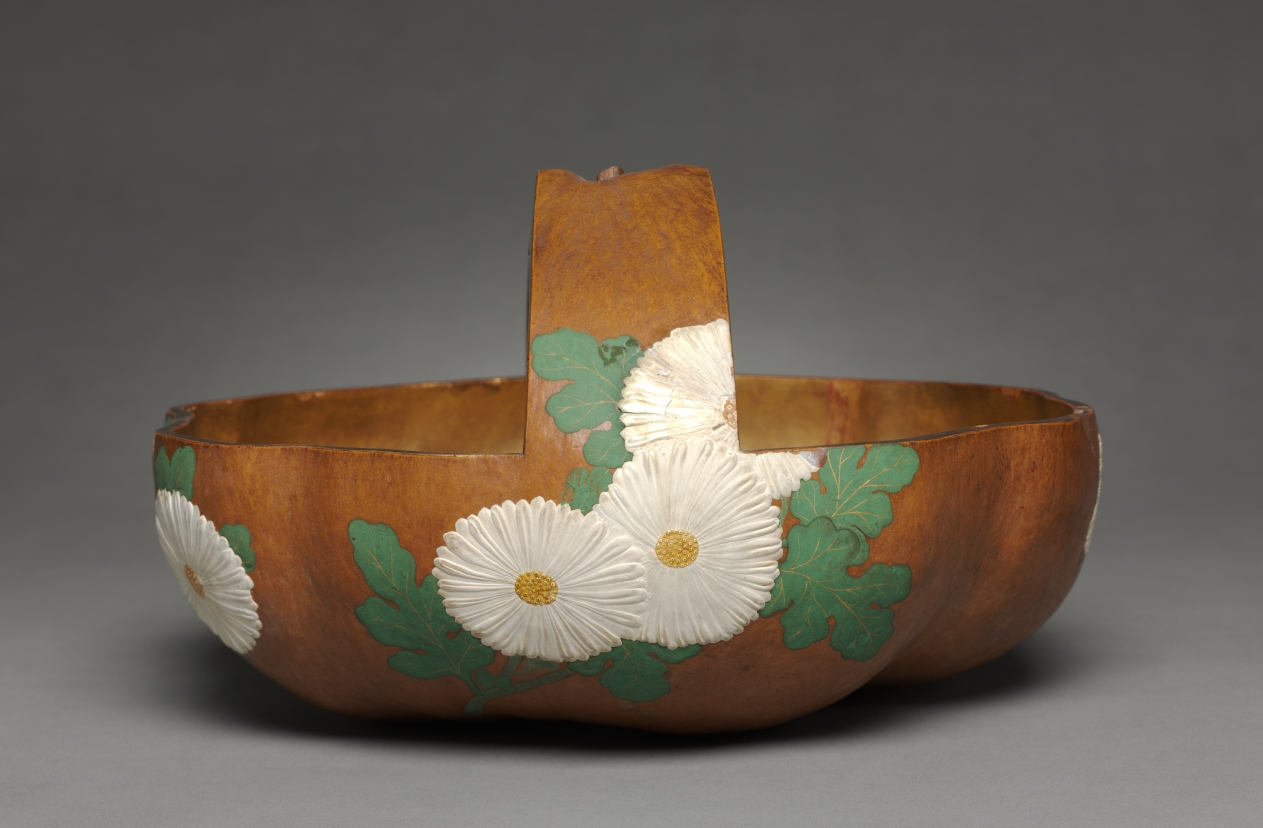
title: Gourd Basket with Chrysanthemum Design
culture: Japan, Edo period (1615–1868)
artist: attributed to Ogata Kōrin (Japanese, 1658–1716)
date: 1700s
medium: gourd; lacquered and painted with gesso, color, and gold pigments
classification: Miscellaneous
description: This very rare basket is made from a carved gourd and inscribed on the bottom with the signature of Ogata Korin (1658– 1716), a painter and lacquerer who founded the Rimpa school. Here, he applied the chrysanthemums with white gesso in relief. This basket is decorated with opaque green paint, and its inside is lined with gold.